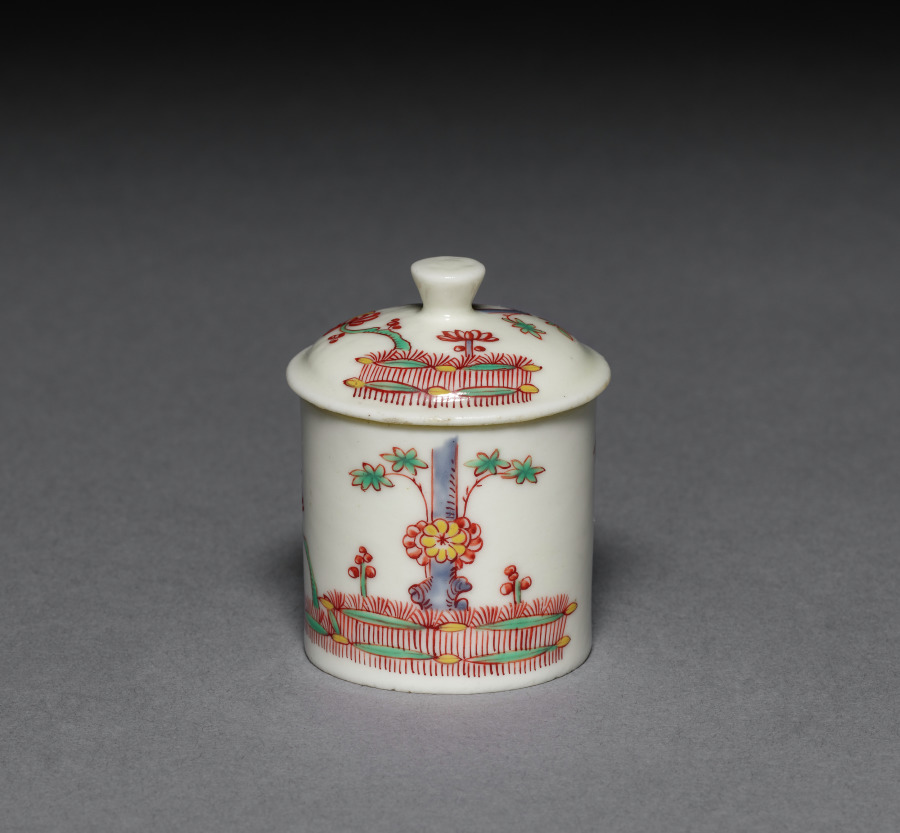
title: Pomade Pot with Cover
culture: France, 18th century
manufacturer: Saint Cloud Porcelain Factory (French)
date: c. 1730–40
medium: soft-paste porcelain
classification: Ceramic